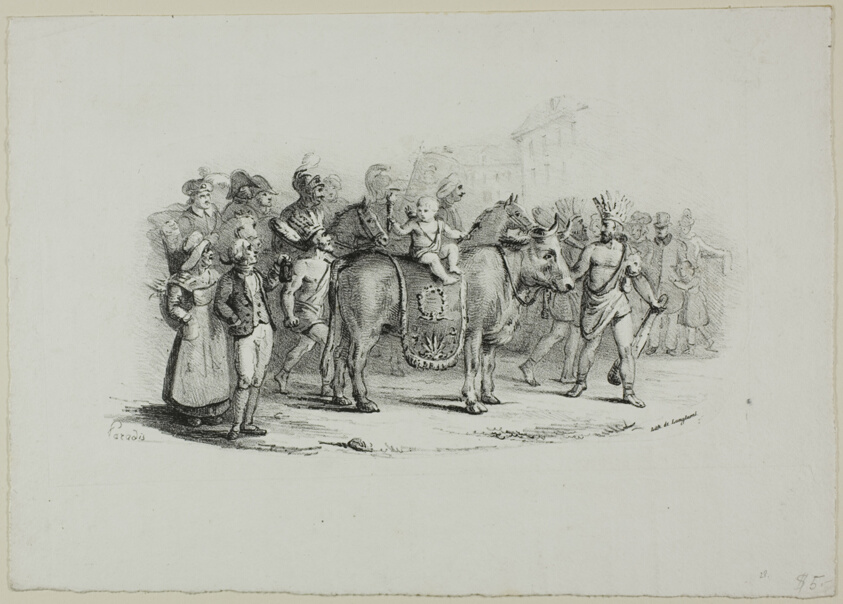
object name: Print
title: Untitled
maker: Nicolas-Michel Paradis (French, born 1792, active c. 1820); printed by Langlumé (French, active 1822-1840)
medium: Lithograph in black on ivory wove paper, cut irregularly around image, laid down on ivory wove paper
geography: France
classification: lithograph; print; prints and drawing